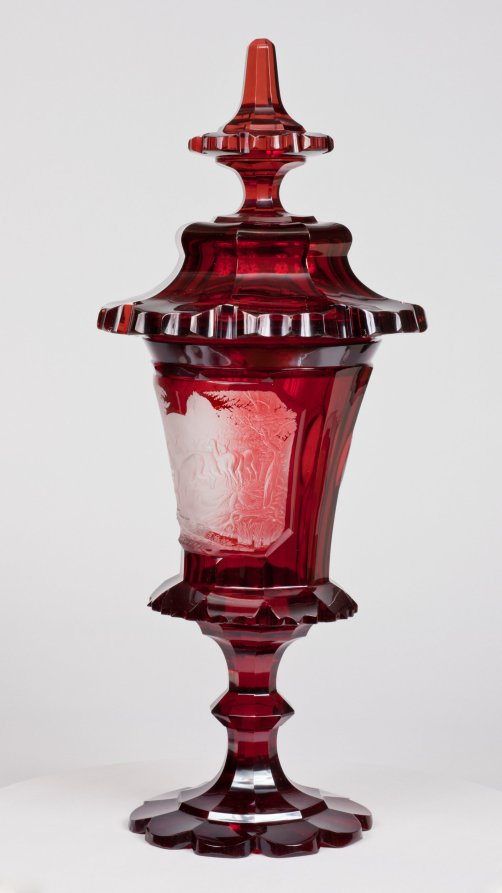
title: Covered Cup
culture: Bohemia, 19th century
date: mid-1800s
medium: ruby glass with engraved decoration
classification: Glass